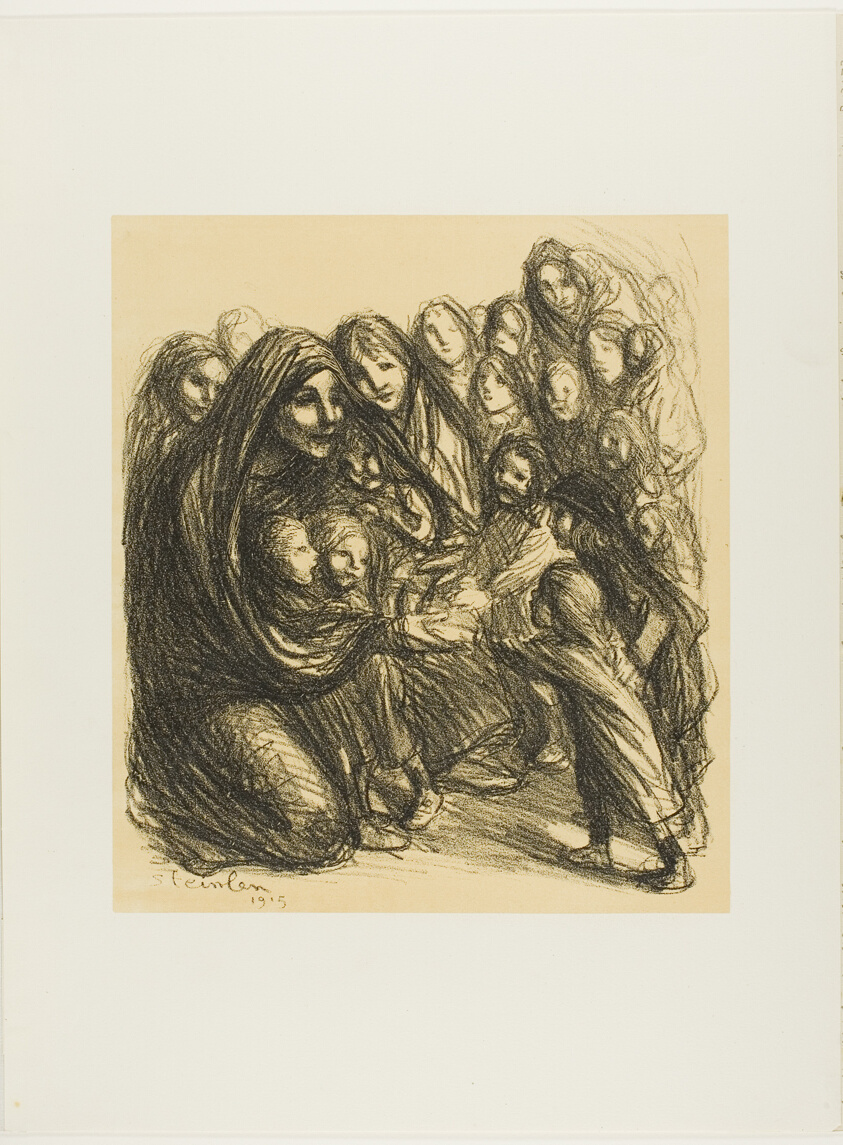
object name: Print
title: For the Daughters of Soldiers Killed on the Field of Honor, plate thirteen from Actualités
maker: Théophile-Alexandre Steinlen; French, born Switzerland, 1859-1923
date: 1915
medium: Lithograph in black with scraping on stone over fawn tint on thick off-white wove paper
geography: France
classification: lithograph; print; prints and drawing